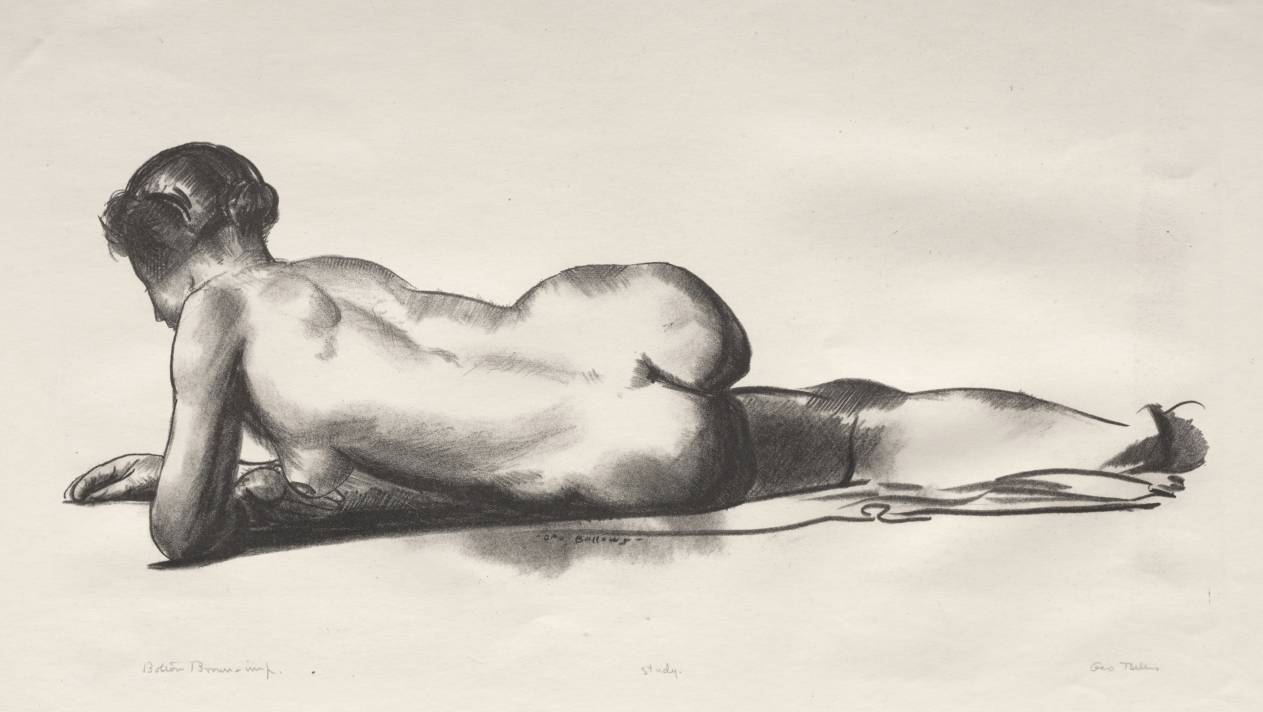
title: Nude Study, Woman Lying Prone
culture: America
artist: George Bellows (American, 1882–1925)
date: 1924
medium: lithograph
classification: Print